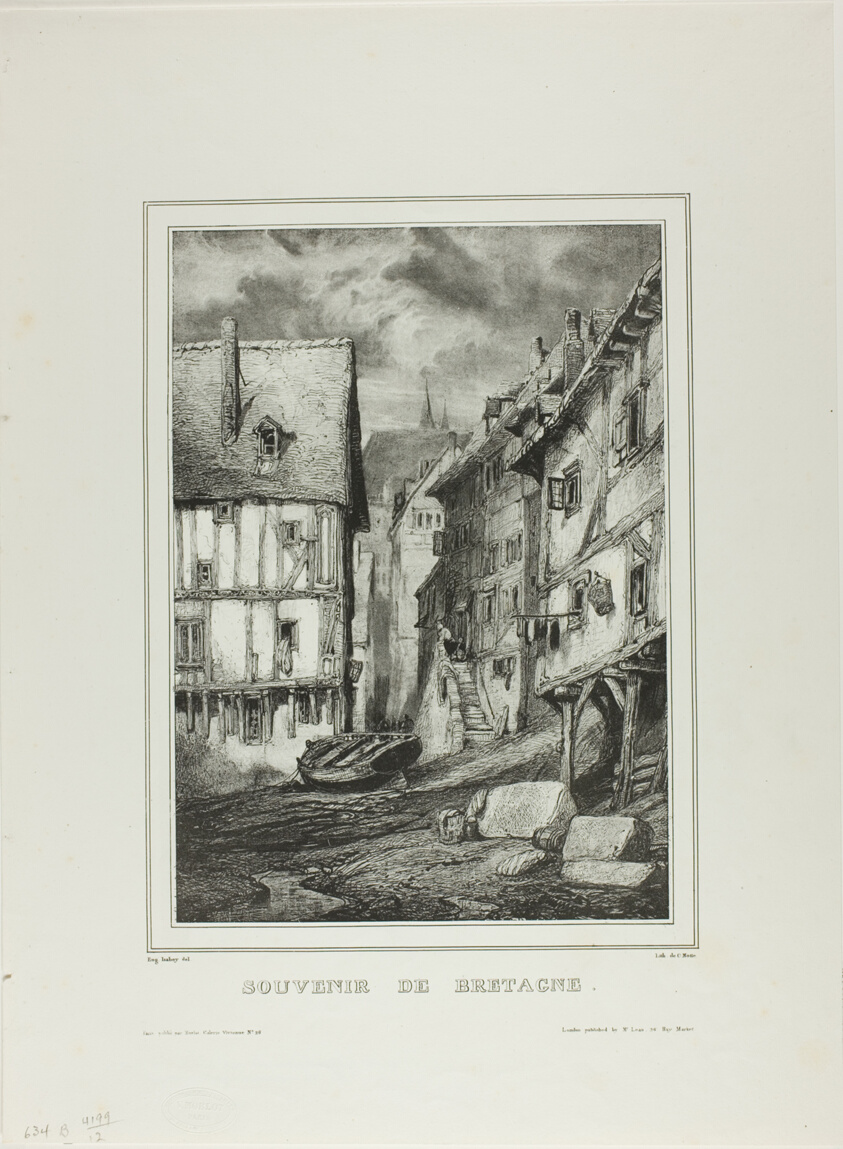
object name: Print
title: Plate Four, from Souvenir of Brittany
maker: Eugène Isabey (French, 1803-1886); printed by Charles Étienne Pierre Motte (French, 1785-1836)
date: 1832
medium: Lithograph in black on ivory wove paper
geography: France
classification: lithograph; print; prints and drawing